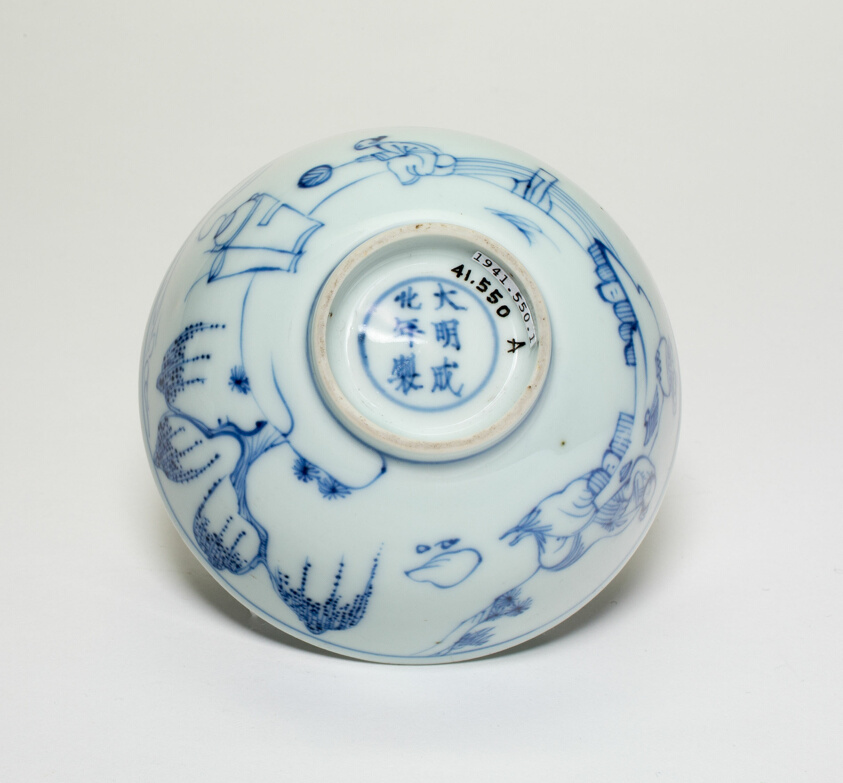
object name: Vessel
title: Bowl with Scholar and Attendant by a Willow Tree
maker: China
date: Early Qing dynasty (1644–1911), 17th/18th century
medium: Porcelain painted in underglaze blue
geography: China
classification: porcelain; asian art; ceramics